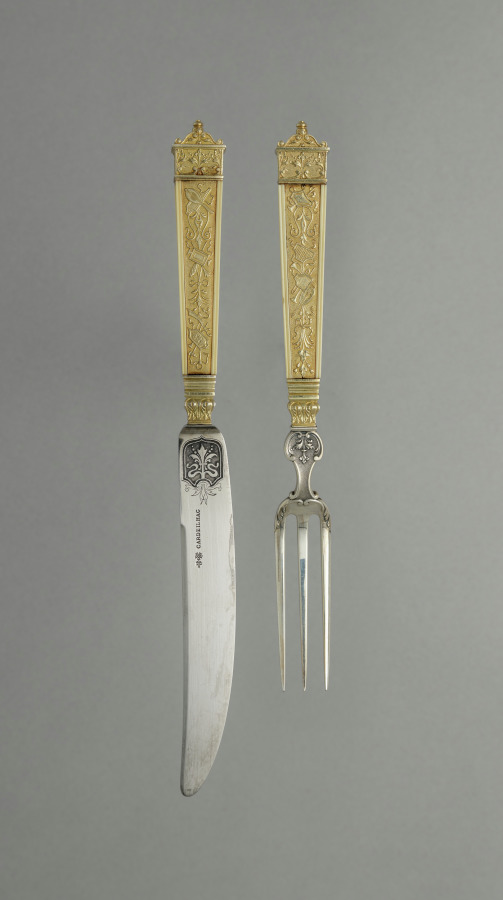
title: Dessert Knife and Fork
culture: France, 19th century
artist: Maison Cardeilhac (French)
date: c. 1880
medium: gilt silver and ivory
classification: Silver